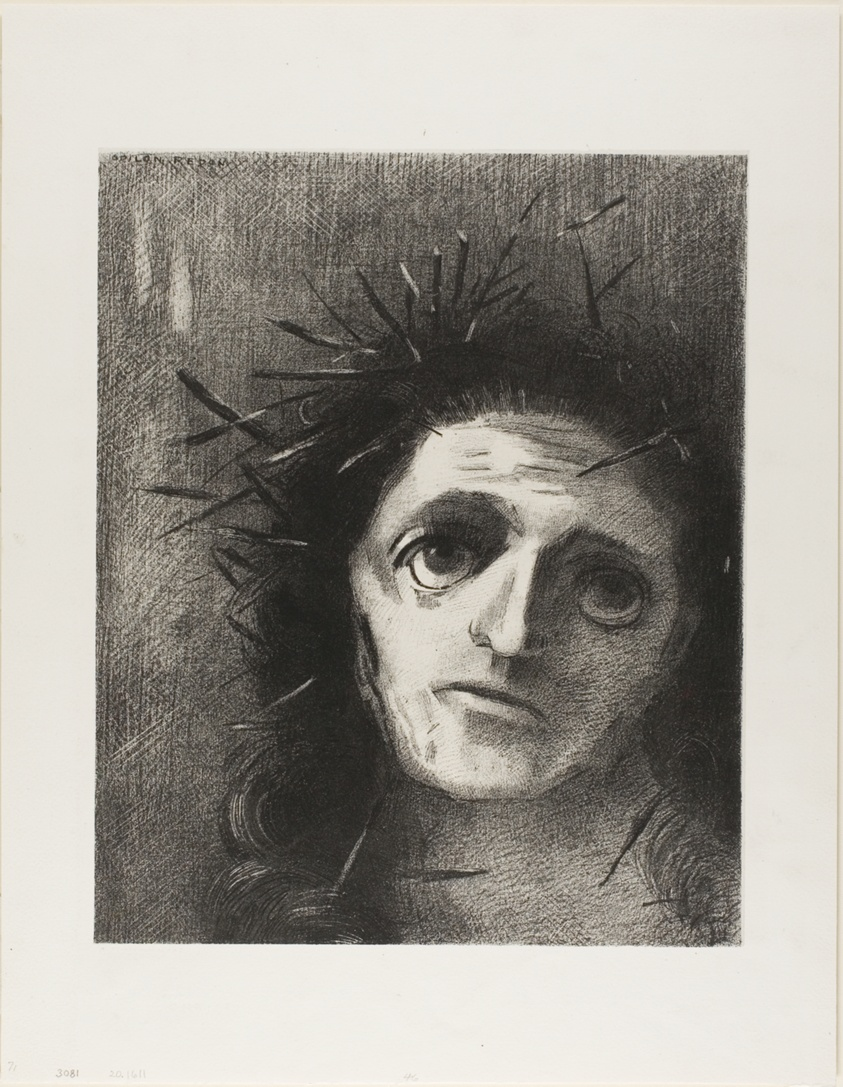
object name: Print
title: Christ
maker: Odilon Redon (French, 1840-1916)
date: 1887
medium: Lithograph in black on ivory China paper laid down on white wove paper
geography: France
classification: lithograph; print; prints and drawing; paper